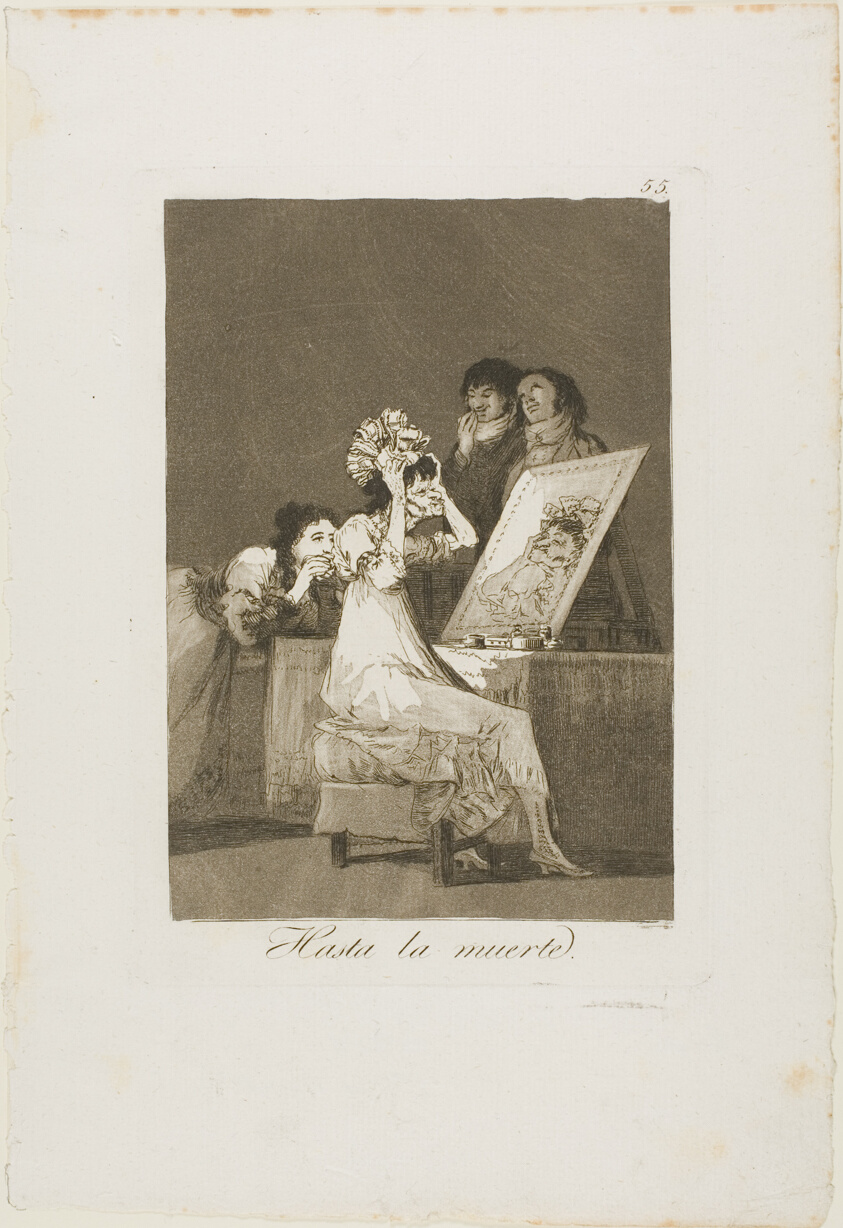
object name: Print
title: Until Death, plate 55 from Los Caprichos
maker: Francisco José de Goya y Lucientes (Spanish, 1746-1828)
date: 1797/99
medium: Etching, burnished aquatint, and drypoint on ivory laid paper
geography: Spain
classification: etching; print; prints and drawing